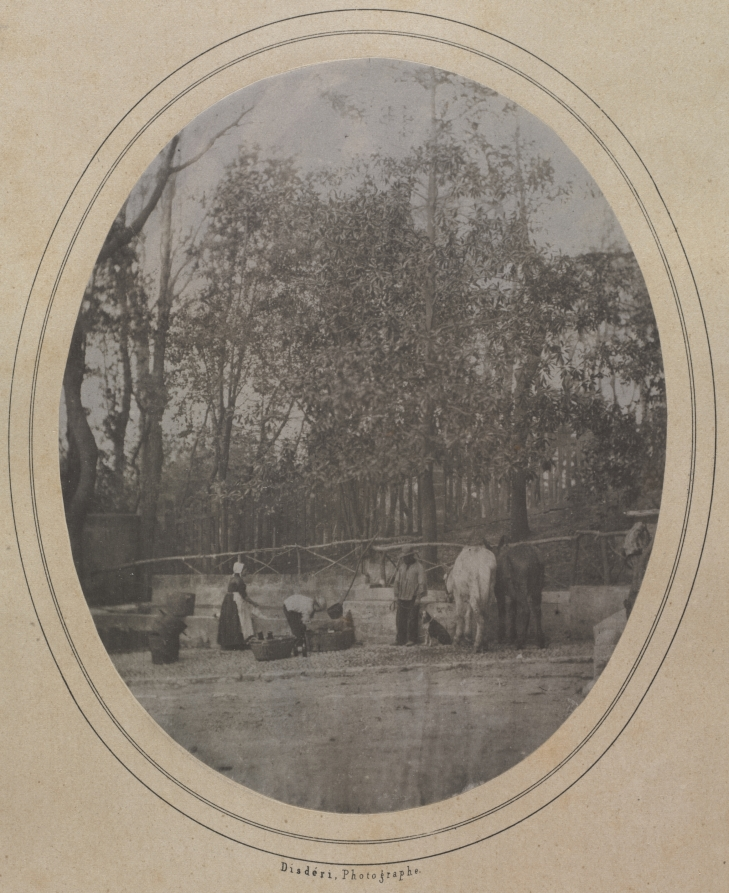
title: Village Scene (Southern France)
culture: France, 19th century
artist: André Adolphe-Eugène Disdéri (French, 1819–1889)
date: c. 1853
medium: salted paper print from waxed-paper negative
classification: Photograph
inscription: Written in black ink on recto: "Disdéri, Photographe"; in pencil on verso: "10 N[?]"; 1853 [underlined]"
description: André Adolphe-Eugène Disdéri is best known for his development in Paris in 1854 of the carte-de-visite format for portraits. The year before, he was living in Southern France where he made this rural view. It is printed from a waxed-paper negative, a process he used for only a short time. The oval cropping and picturesque scene—posed but seemingly spontaneous—suggest that this is meant to be an artistic, rather than a documentary, photograph.